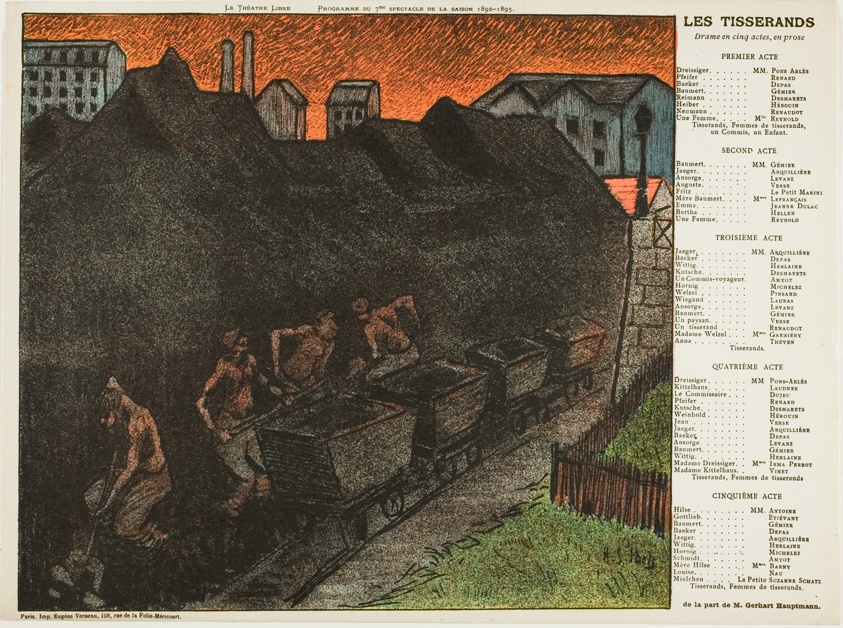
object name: Print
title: Seventh Performance: Les Tisserands, for Le Théatre Libre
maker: Henri-Gabriel Ibels (French, 1867-1936); printed by Imprimerie Eugène Verneau (French, 19th century-1906)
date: 1892–93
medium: Color lithograph on ivory wove paper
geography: France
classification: lithograph; print; prints and drawing